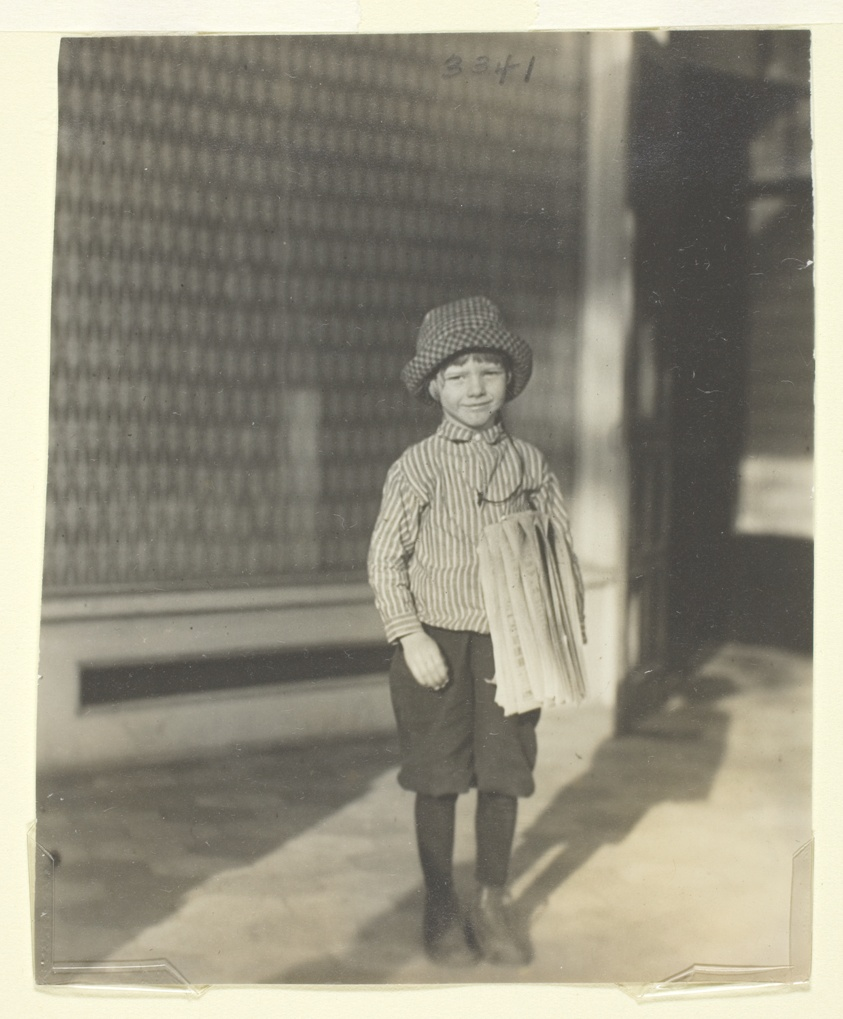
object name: Photograph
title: Leslie Cooper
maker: Lewis Wickes Hine (American, 1874–1940)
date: c. 1910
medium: Gelatin silver print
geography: United States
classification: gelatin silver (developing-out-paper) pr; photographic process; photography; photograph